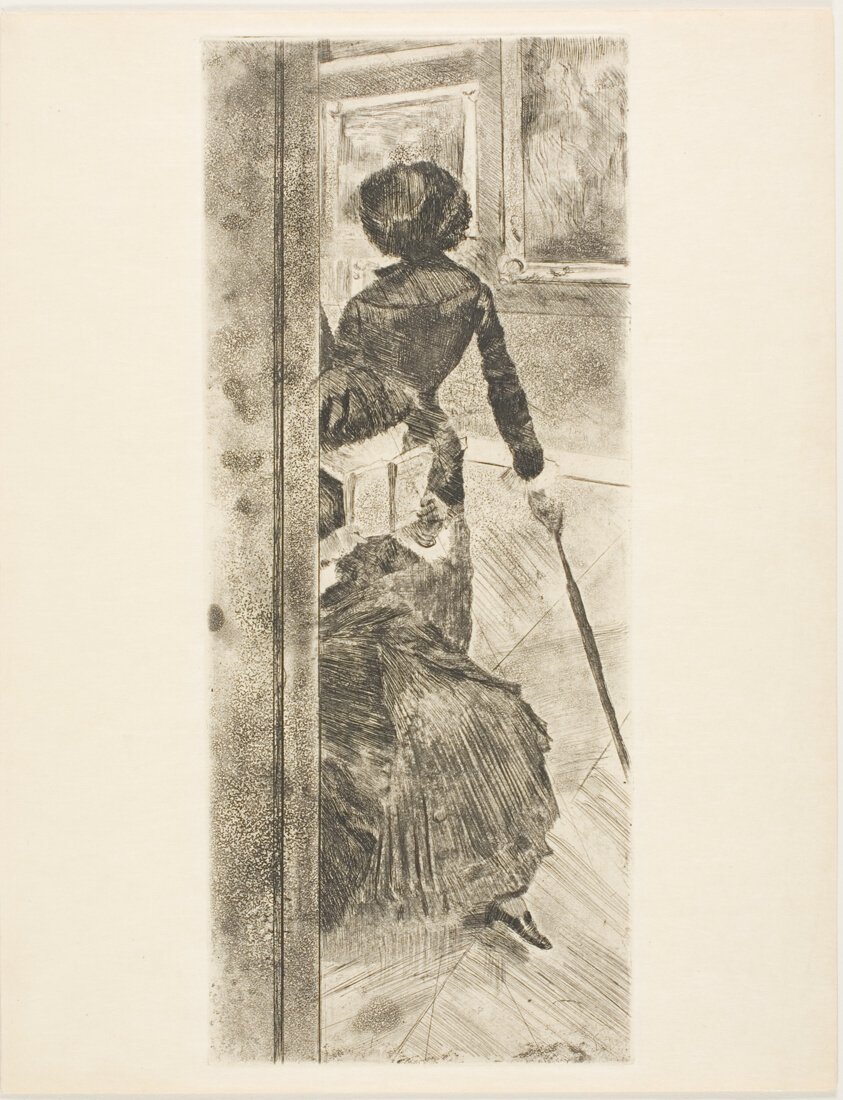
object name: Print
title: Mary Cassatt at the Louvre: The Paintings Gallery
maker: Edgar Degas; French, 1834-1917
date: 1879–80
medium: Etching, soft ground etching, aquatint, and drypoint on cream wove paper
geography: France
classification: etching; print; prints and drawing; paper